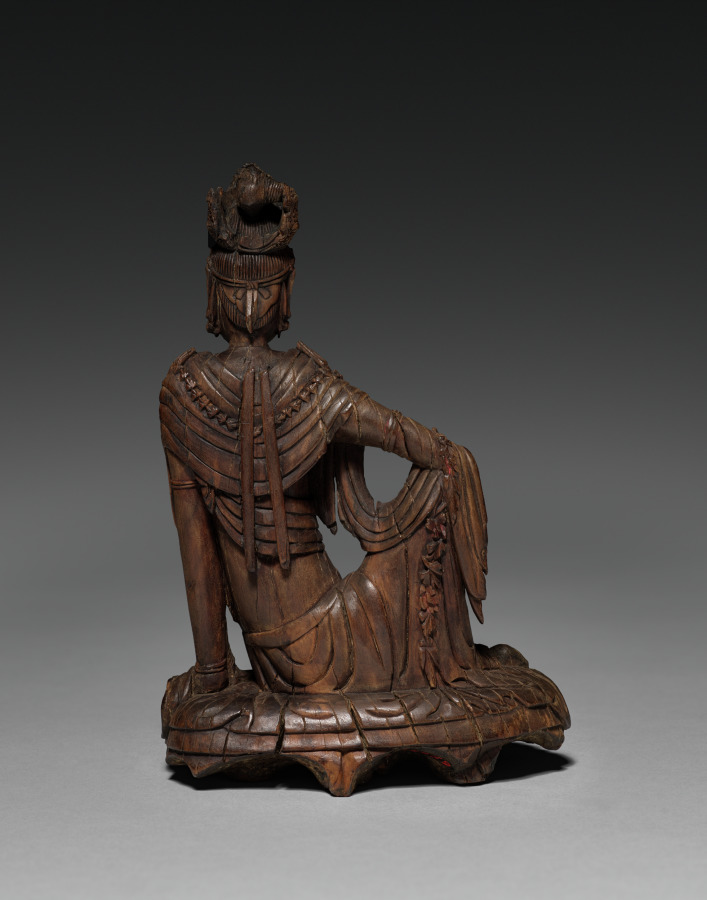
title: Potalaka Guanyin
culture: China, Five dynasties (907-960)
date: 900s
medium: Carved sandalwood with traces of paint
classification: Sculpture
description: This portable figure of Guanyin, the Bodhisattva of Compassion who vowed to stay on earth to help human beings, is carved of precious sandalwood. It is lavishly covered with garlands of flowers that retain traces of the original red paint. The small sculpture may have been used in a private devotional context.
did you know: Mount Potala is the mythical home of the bodhisattva Avalokiteśvara, called Guanyin in Chinese.